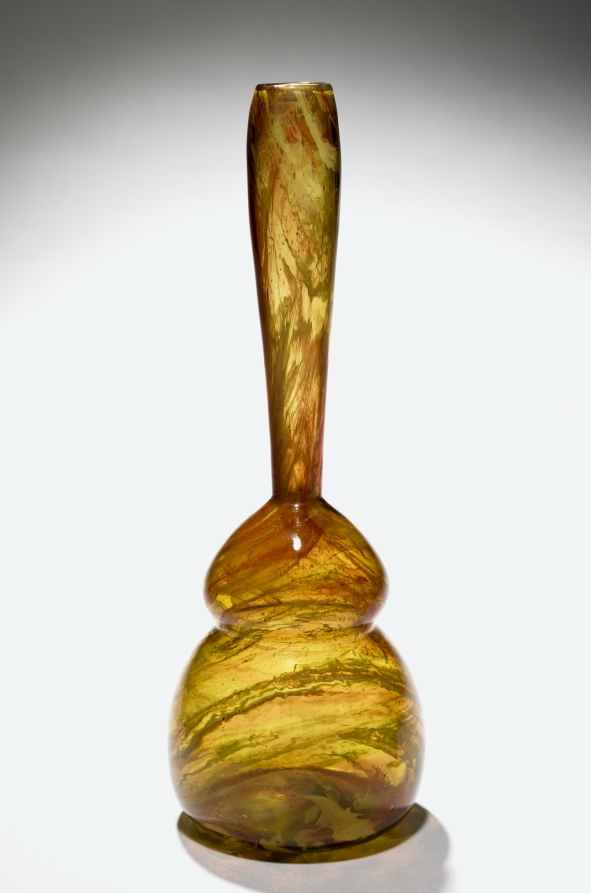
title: Vase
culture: England, 19th century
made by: James Couper and Sons (Scottish)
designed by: Christopher Dresser (British, 1834–1904)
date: c. 1895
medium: clutha glass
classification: Glass